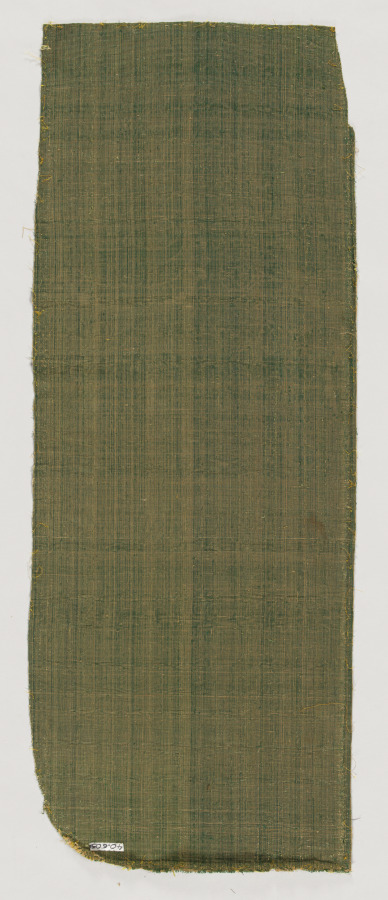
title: Velvet Fragments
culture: Spain, early 16th century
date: early 16th century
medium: velvet (cut, voided, and brocaded): silk and gold thread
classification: Velvet